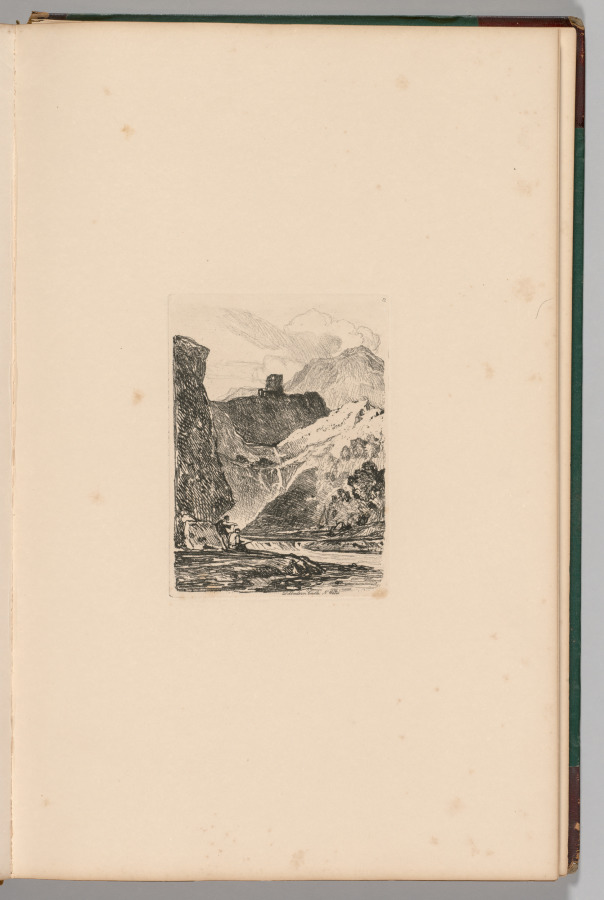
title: Liber Studiorum: Plate 12, Dolbadern Castle, Llanberris Lake, North Wales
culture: England, 19th century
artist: John Sell Cotman (British, 1782–1842)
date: 1838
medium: softground etching, from a bound volume containing 48 plates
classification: Bound Volume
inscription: In plate, within image, upper right: 12; in plate, below image: Dolbadern Castle, N. Wales